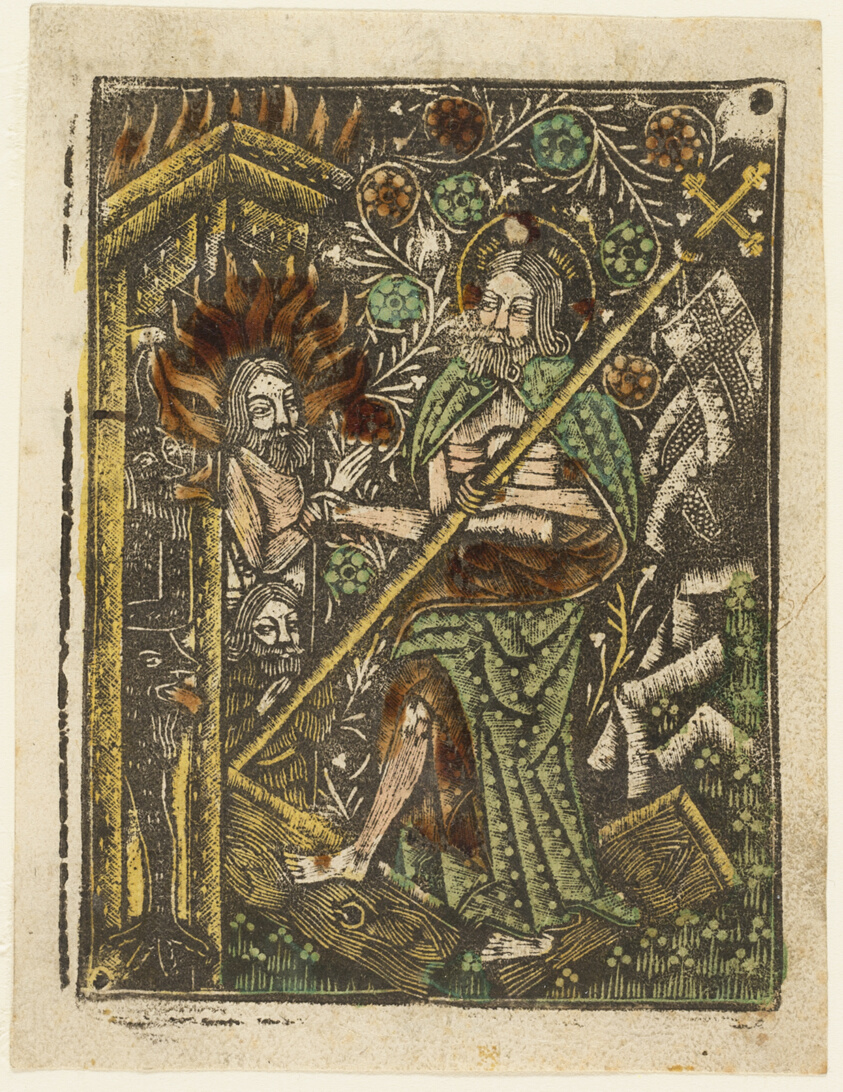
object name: Print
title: Christ in Limbo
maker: Artist unknown; Bavarian, 15th century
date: 1460–65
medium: Metalcut in black hand colored with brush and watercolor in yellow, red-brown lake, and green, on ivory laid paper, with manuscript text in pen and brown ink on verso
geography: Germany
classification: dotted/metal cut; book; prints and drawing; print